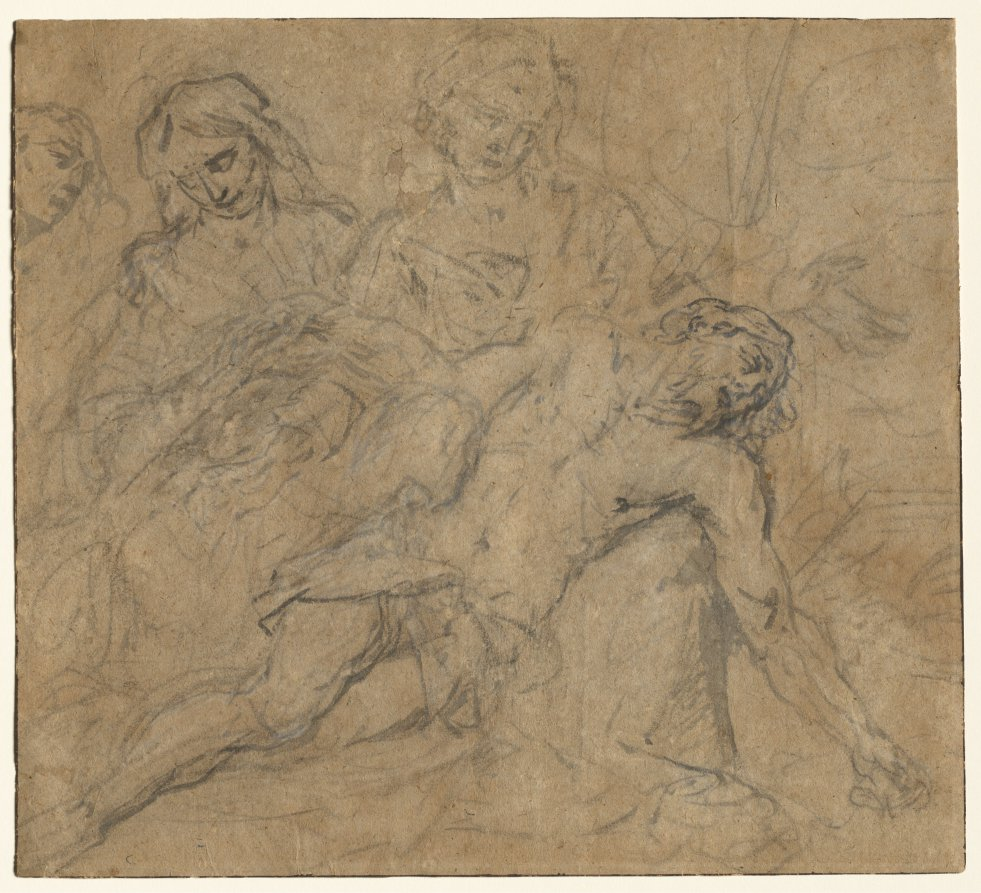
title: The Lamentation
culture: Flanders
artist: attributed to Gaspar de Crayer (Flemish, 1584–1669)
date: c. 1635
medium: black chalk and brush and gray wash heightened with white chalk; framing lines in black ink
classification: Drawing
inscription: VERSO OF SECONDARY SUPPORT, lower right, in graphite: 63